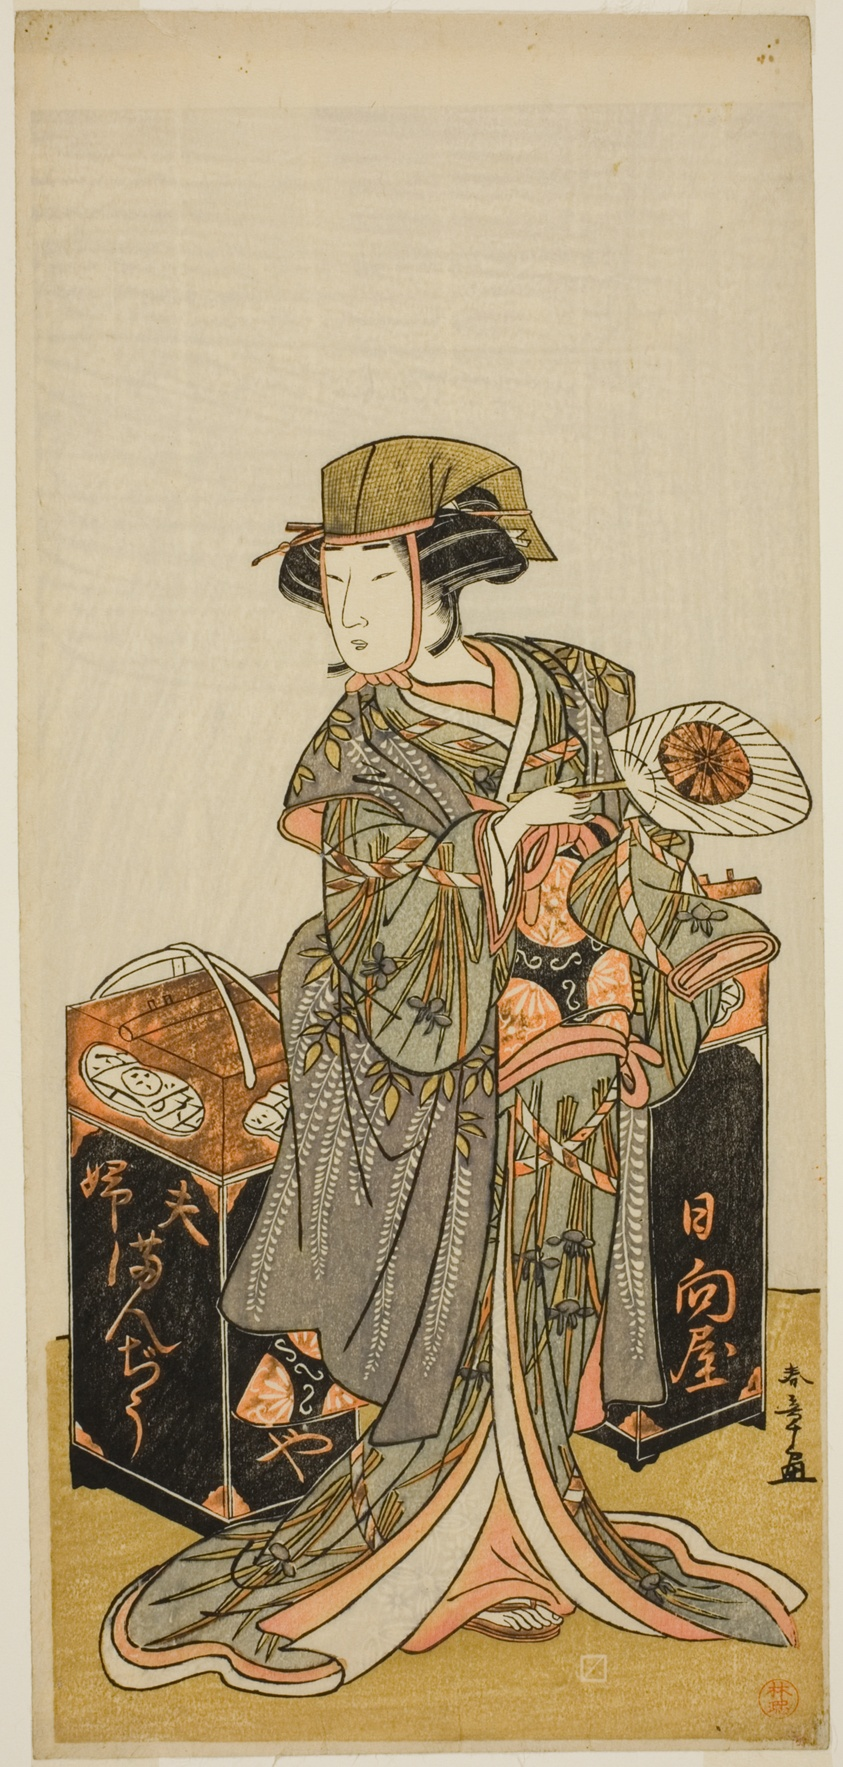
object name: Print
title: The Actor Nakamura Tomijuro I as the Female Beancake Peddler Hyugaya in the Play Chigo Torii Tobiiri Kitsune, Performed at the Ichimura Theater in the Eleventh Month, 1777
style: Japanese (culture or style)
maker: Katsukawa Shunsho 勝川 春章; Japanese, 1726-1792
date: c. 1777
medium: Color woodblock print; hosoban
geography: Japan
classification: woodblock print; print; asian art